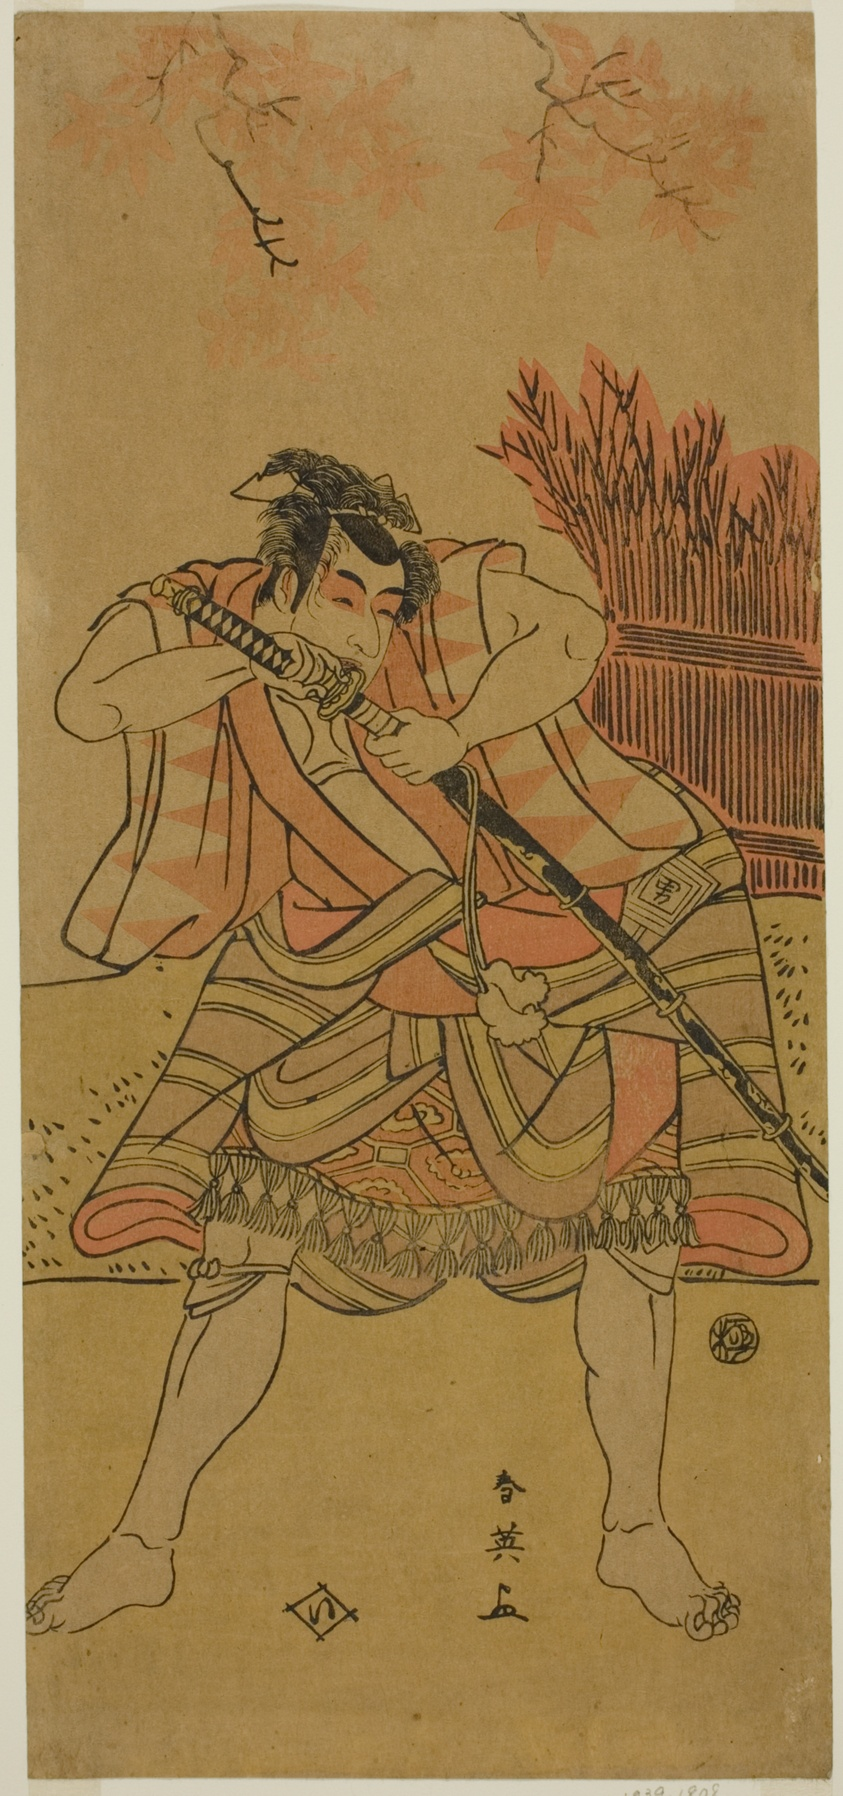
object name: Print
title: The Actor Ichikawa Omezo I as Kamei Rokuro Disguised as the Servant Dadahei in the Play Kimmenuki Genke no Kakutsuba, Performed at the Ichimura Theater in the Eleventh Month, 1791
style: Japanese (culture or style)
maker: Katsukawa Shun'ei (Japanese, 1762-1819)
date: c. 1791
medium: Color woodblock print; hosoban; left sheet of diptych (?)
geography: Japan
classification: woodblock print; print; asian art